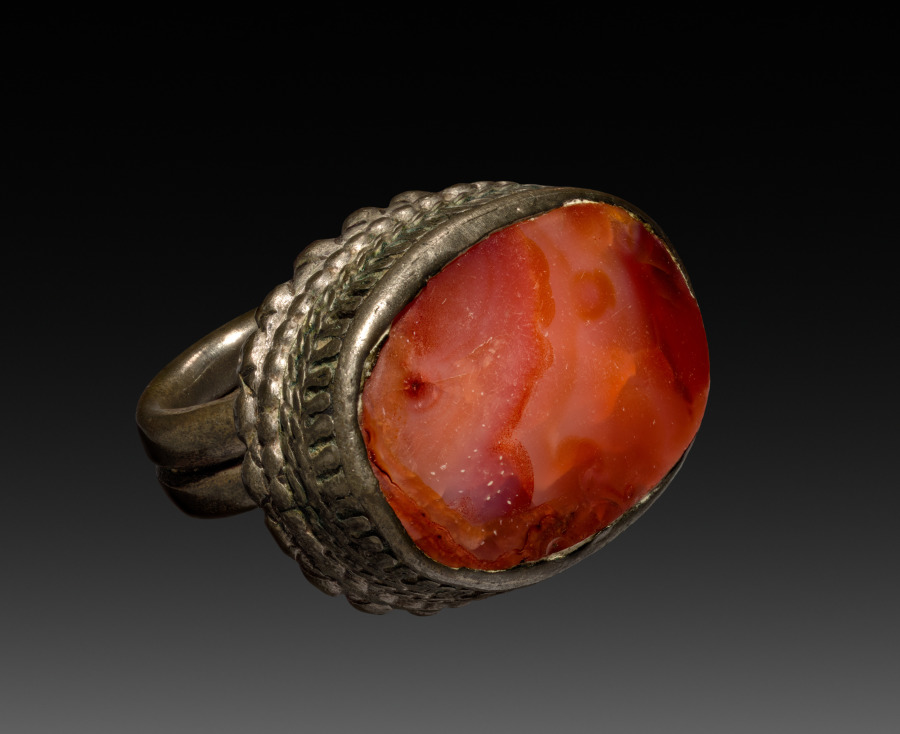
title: Ring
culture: Tibet(?)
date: 1800s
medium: silver with cornelian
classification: Jewelry